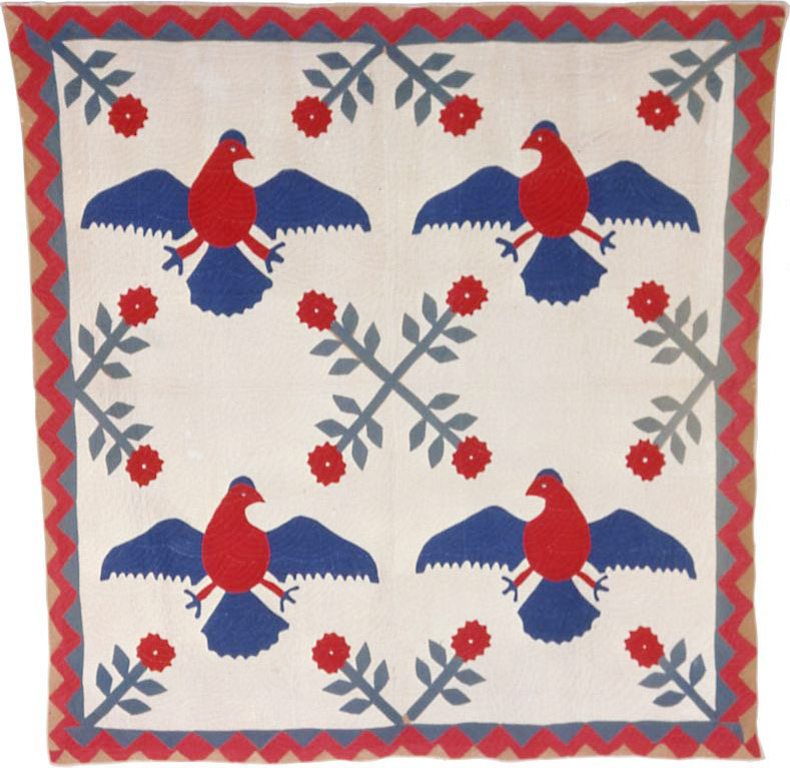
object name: Textile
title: Bedcover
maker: United States, Pennsylvania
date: 1850/1900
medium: Cotton, plain weave; pieced; appliquéd with cotton, plain weave, printed; quilted; backed with cotton, plain weave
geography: United States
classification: textile; needlework - quilt